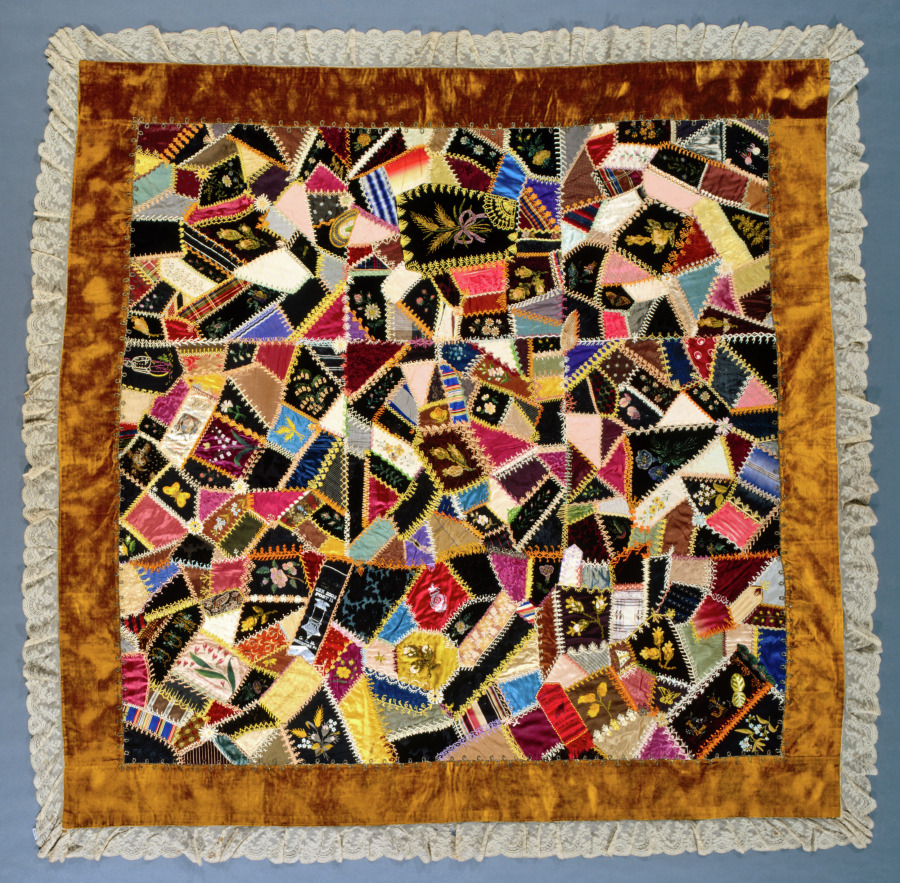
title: Crazy Quilt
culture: America, New York, Watertown, 19th century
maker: Louisa Joiner (American, 1844–1911)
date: c. 1887–1900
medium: silk, ribbons, lace, velvet, embroidered, heat transfer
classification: Textile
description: Made from an eye-catching combination of fabrics and ribbons, this quilt was created by Louisa Joiner, whose initials appear on a panel at lower right. Some of its pieces are believed to be scraps cut from clothing worn on lake cruises. Little is known about the artist aside from the fact she was married to a captain who sailed on the Great Lakes.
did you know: Crazy quilts got their name from being made of seemingly random scraps of material assembled in an apparently arbitrary pattern.